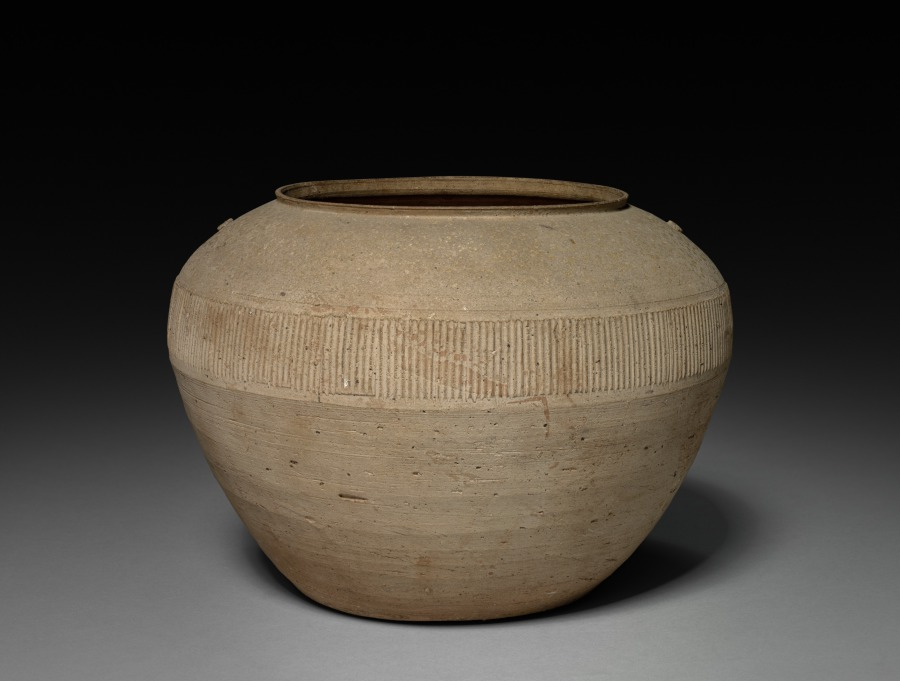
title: Jar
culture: China, Eastern Zhou dynasty (770–256 BCE), Warring States period (475–221 BCE)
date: 481–221 BCE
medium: stoneware with incised and applied decoration under a thin ash glaze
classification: Ceramic